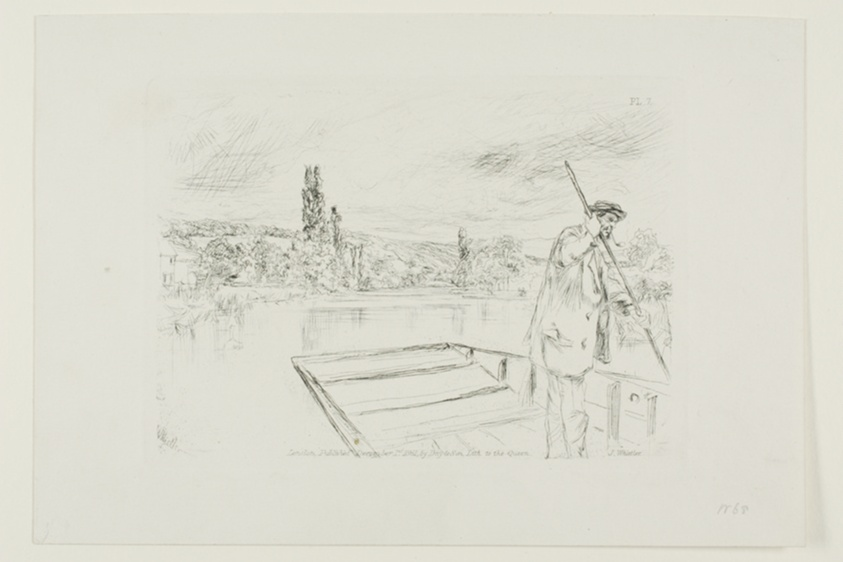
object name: Print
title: The Punt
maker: James McNeill Whistler (American, 1834-1903)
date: 1861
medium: Etching and drypoint with foul biting in black ink on ivory wove paper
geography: United States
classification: etching; foul biting; print; prints and drawing; paper; drypoint